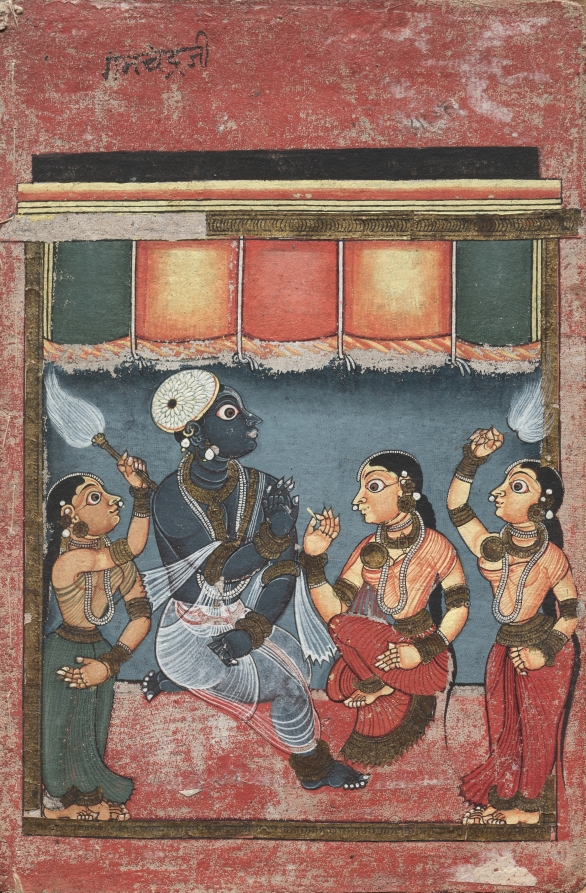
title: Krishna with Radha and Two Attendants (recto)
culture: Southern India, Andhra Pradesh, possibly Tirupati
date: 1700s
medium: color on cloth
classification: Painting